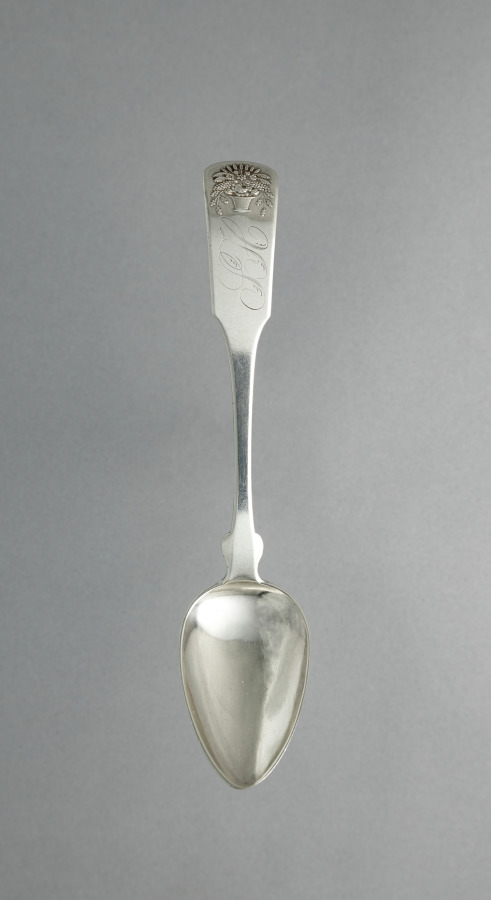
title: Tablespoon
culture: America, New York, Rochester, 19th century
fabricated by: Erastus Cook (American, 1793–1864)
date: c. 1850–1860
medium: silver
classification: Silver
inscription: "SH" in bright-cut script on top of handle end.